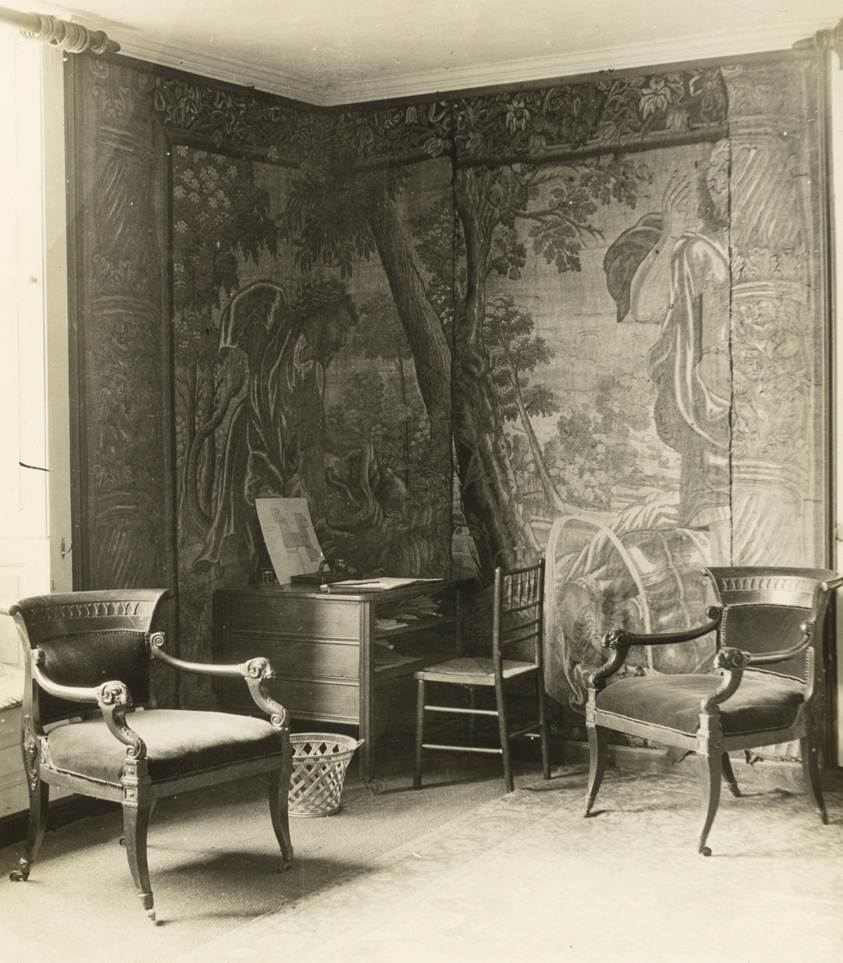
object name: Photograph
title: Kelmscott Manor: In the Tapestry Room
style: Pictorialism, 19th century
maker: Frederick H. Evans (English, 1853–1943)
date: 1896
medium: Lantern slide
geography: England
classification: photograph; photography